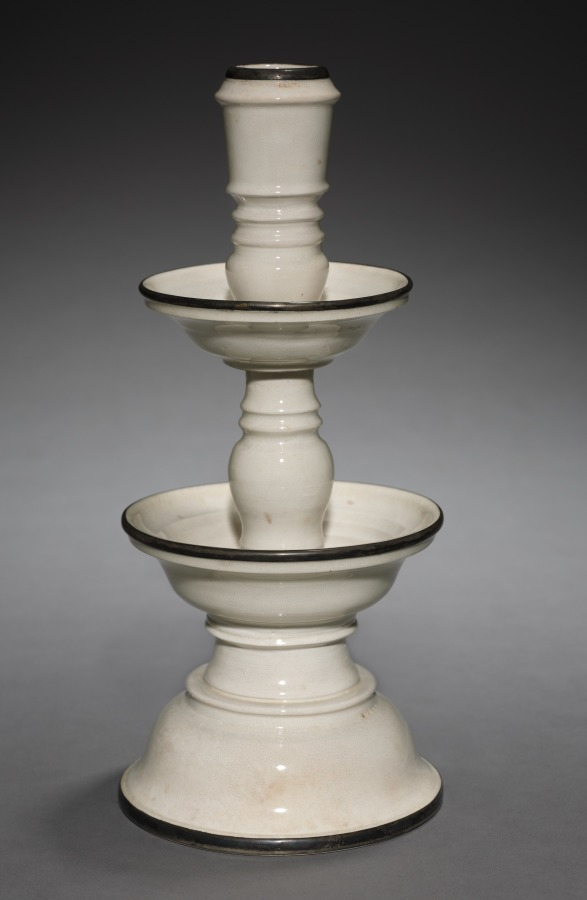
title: Candlestick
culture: China, Ming dynasty (1368–1644)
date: 1600s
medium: glazed porcelain with metal rims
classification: Ceramic